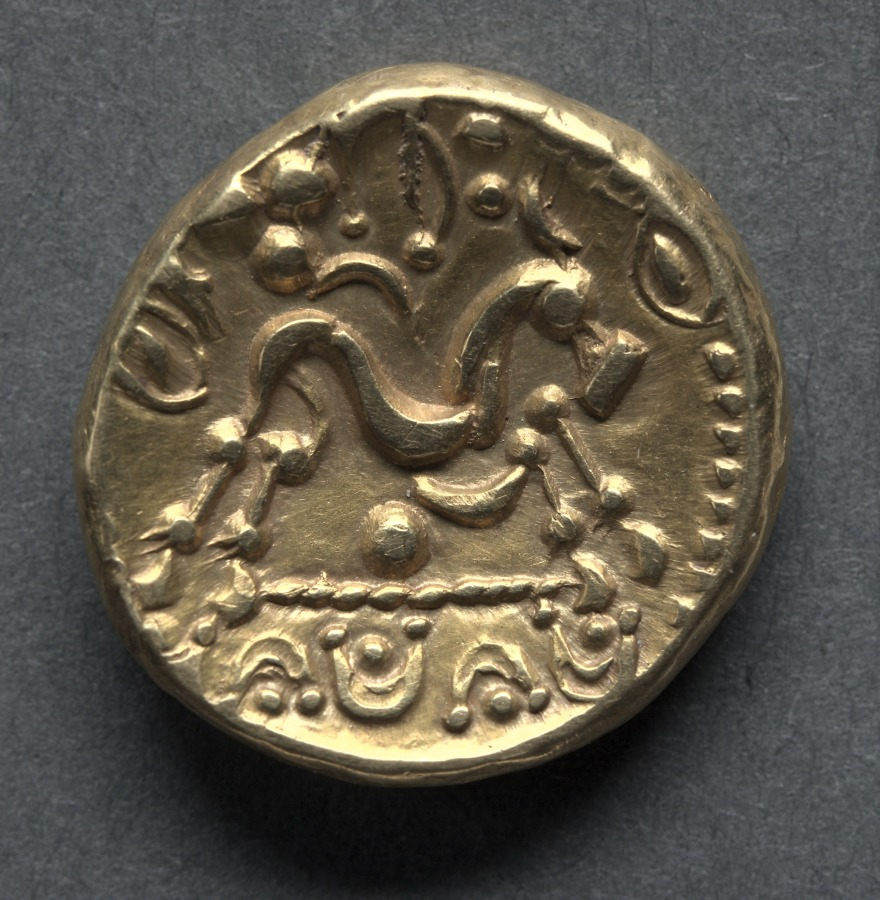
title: Stater: Plain (obverse); Horse (reverse)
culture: England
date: c. 57–45 BCE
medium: gold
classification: Coins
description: Julius Caesar recorded that in the year 57 BC, chieftains who had unsuccessfully resisted him in Gaul took refuge in Britain. This wave of refugees brought with them, and probably also struck in Britain, the staters known as the Gallo-Belgic type (this specific one is known as the Morini type). There is no sign of any part of an obverse design and the horse, now detached from the chariot, has become extremely crude in design. The minting technique however, is good as the design is clear-cut and sharp.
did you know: When struck this coin became concave, curving inward.